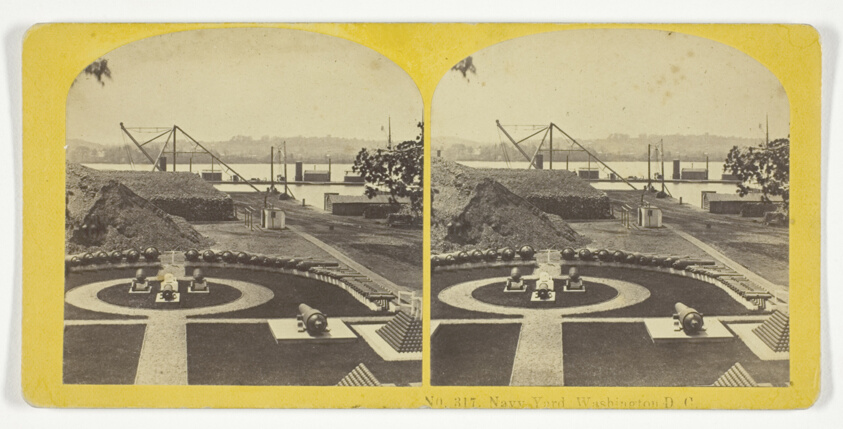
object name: Photograph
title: Navy Yard, Washington D.C.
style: 19th century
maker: Kilburn Brothers (American, active 1855-1875)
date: 1855/75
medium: Albumen print, stereo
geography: New Hampshire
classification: photography; photograph; albumen silver print; stereograph (albumen)